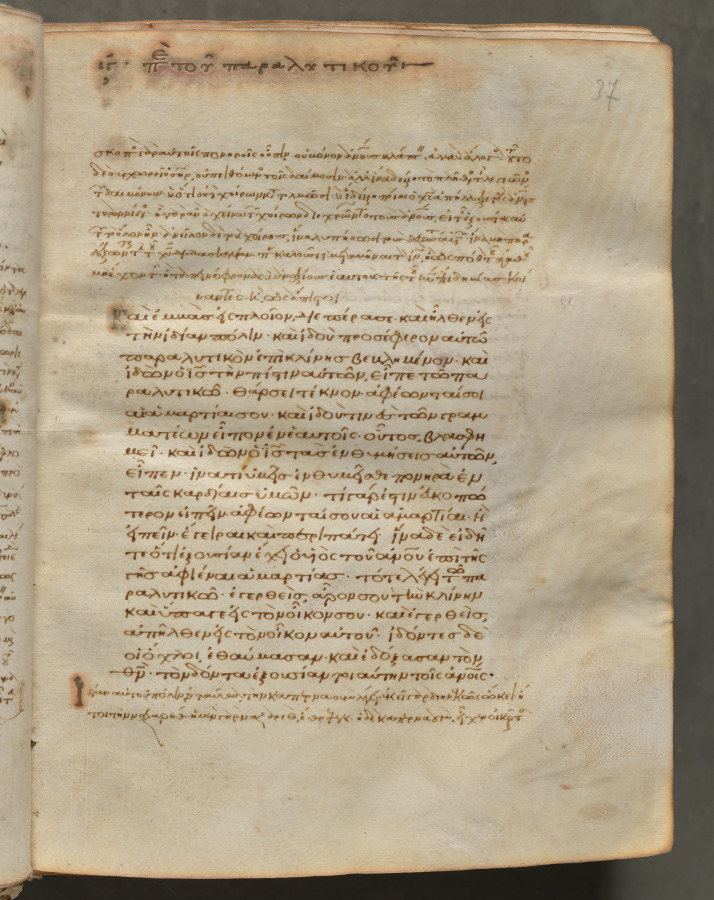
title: Text, folio 37 (recto), from a Gospel Book with Commentaries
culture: Byzantium, Constantinople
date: c. 1000–1100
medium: ink, tempera, and gold on vellum; leather binding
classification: Bound Volume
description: Each of the four gospels in this book opens on a page with brilliantly illuminated borders depicting the author of the text as well as birds-principally peacocks, symbols of the immortality of the soul-and fountains, representing the fountain of life and the salvation of the soul. This volume consists of 428 leaves with texts in Greek. Its level of sophistication suggests that it was probably written and decorated in a monastery in Constantinople.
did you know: Gospel Books were carried in procession through Byzantine churches.